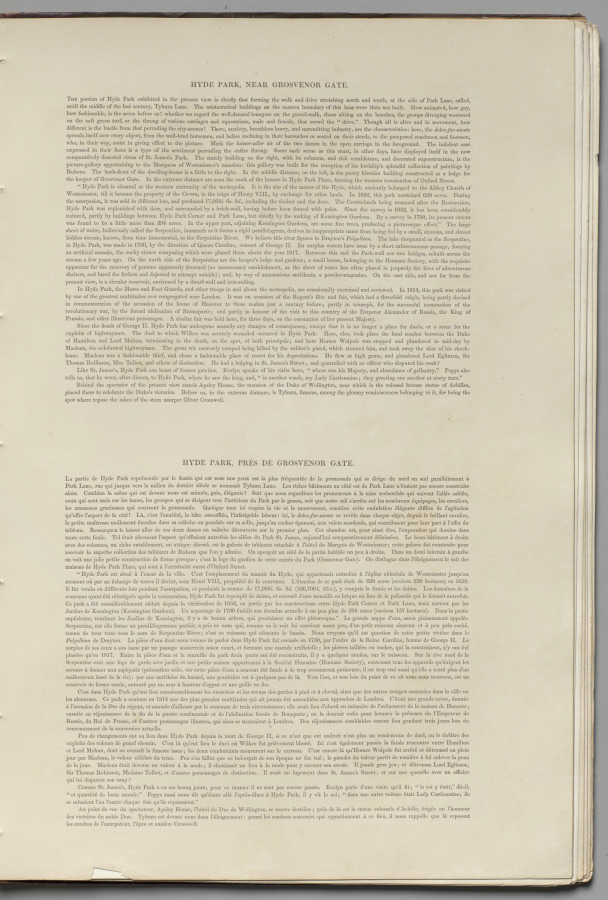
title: London As It Is: Hyde Park, near Grosvenor Gate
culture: England, 19th century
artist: Thomas Shotter Boys (British, 1803–1874)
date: 1842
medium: lithograph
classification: Bound Volume